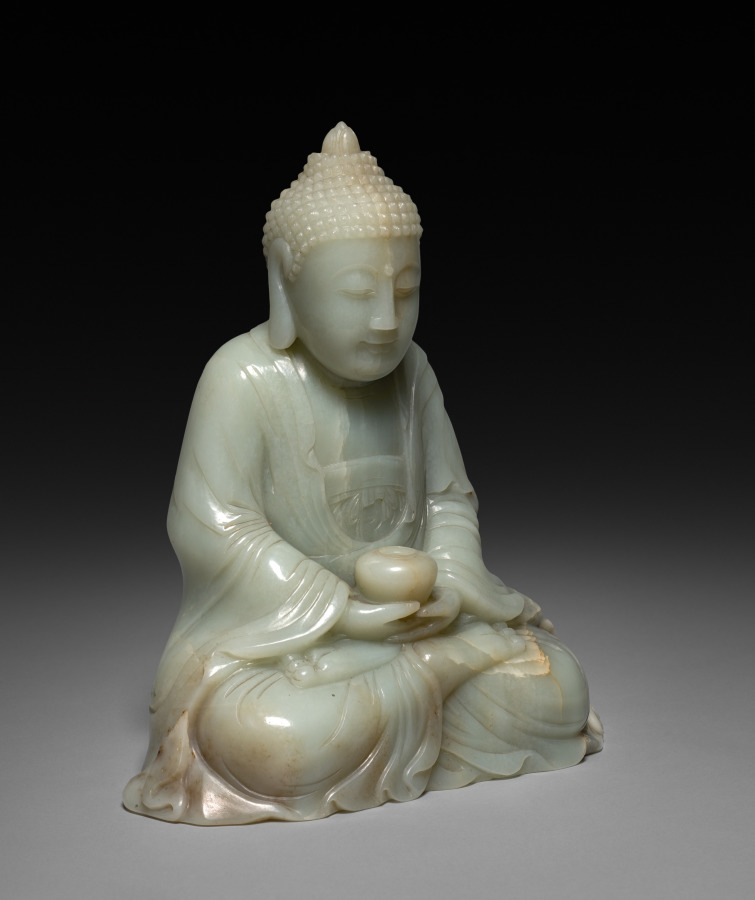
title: Seated Buddha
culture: China, Qing dynasty (1644-1911)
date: 1700s–1800s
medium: jade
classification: Jade